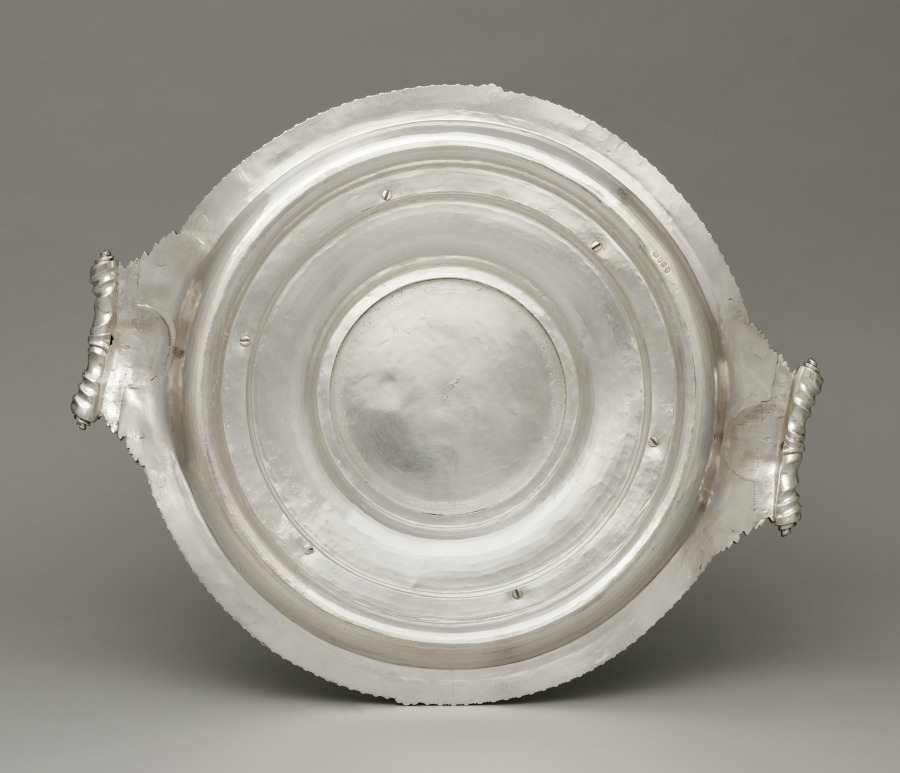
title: Stand for Covered Tureen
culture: England, London, 19th century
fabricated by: Paul Storr (British, 1771–1844)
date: 1812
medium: silver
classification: Silver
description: Silver fulfilled a prominent role in projecting wealth, status, power, and ritual in British life during the 1600s and 1700s. Elaborate forms such as this tureen stand, with its acanthus leaves and fluted detailing, not only represented wealth in its sheer silver weight but also provided royal and aristocratic owners a surface for displaying engraved coats of arms. The arms of the High Sheriff of Yorkshire, Timothy Hutton and his wife Elizabeth Chaytor of Spennithorne Hall in northern England are engraved on this stand by Paul Storr, one of the most prominent London silversmiths of the period.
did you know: This is a stand for a tureen. See cover record.